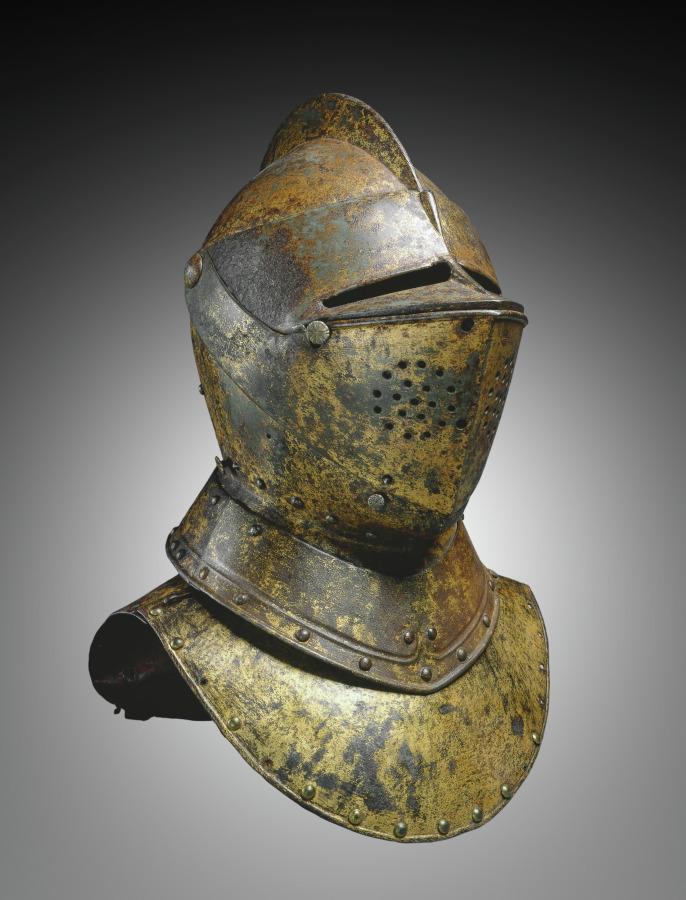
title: Gorget (from a funerary achievement?)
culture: Netherlands(?), late 16th-early 17th Century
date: c.1590–1625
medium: gilded steel (invaded with rust); red velvet lining, plume holder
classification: Arms and Armor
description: This helmet was originally intended for field use. Later, it seems to have served a funerary purpose, probably as an ornament (known as a funerary achievement) suspended over the church tomb of an unidentified knight. As such, it would have been a rich and imposing symbol of the dead knight's social rank and personal authority.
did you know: This helmet and gorget has been decorated by fire-gilding, an extremely toxic process that produced a look of great luxury.